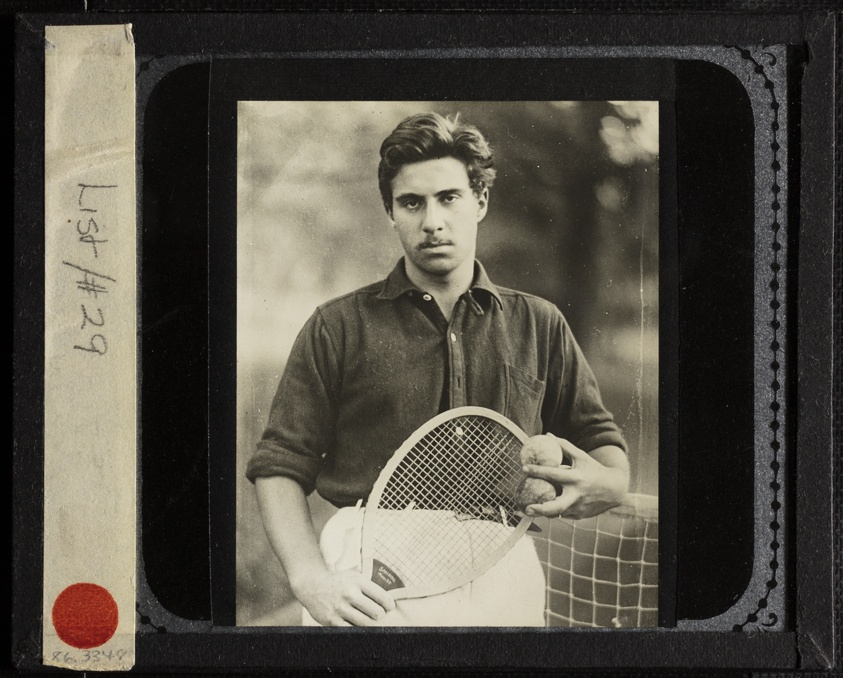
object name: Photograph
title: Untitled (Nephew Edward with tennis racquet)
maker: Alfred Stieglitz (American, 1864–1946)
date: c. 1917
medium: Lantern slide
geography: United States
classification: lantern slide (glass); negative/transparency; photography; photograph